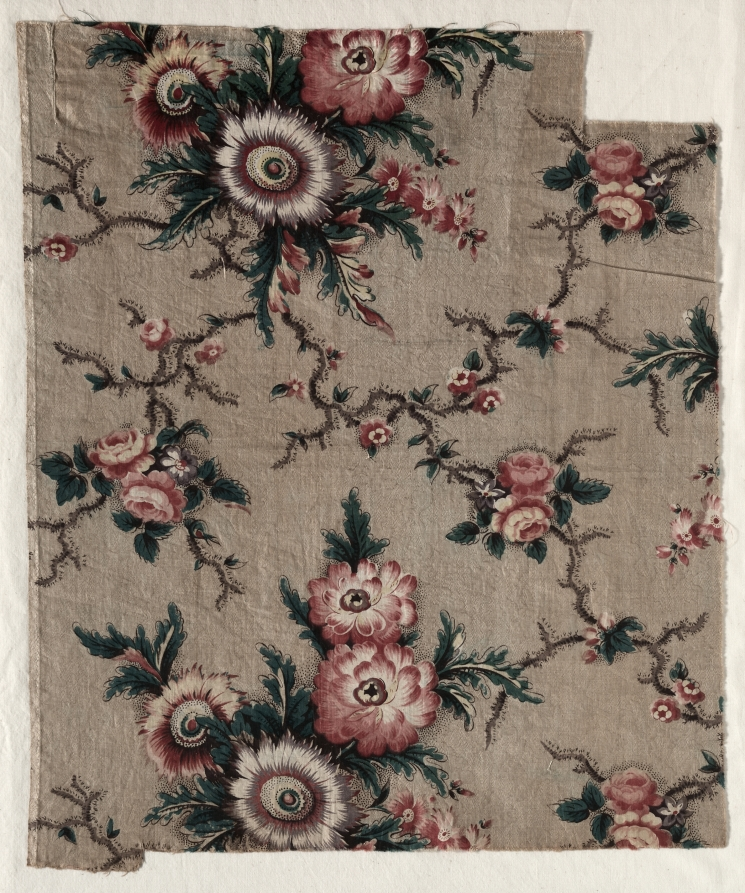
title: Glazed Chintz Fragment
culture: England, Lancashire ?, 19th century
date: c. 1840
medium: machine and block printed cotton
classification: Textile